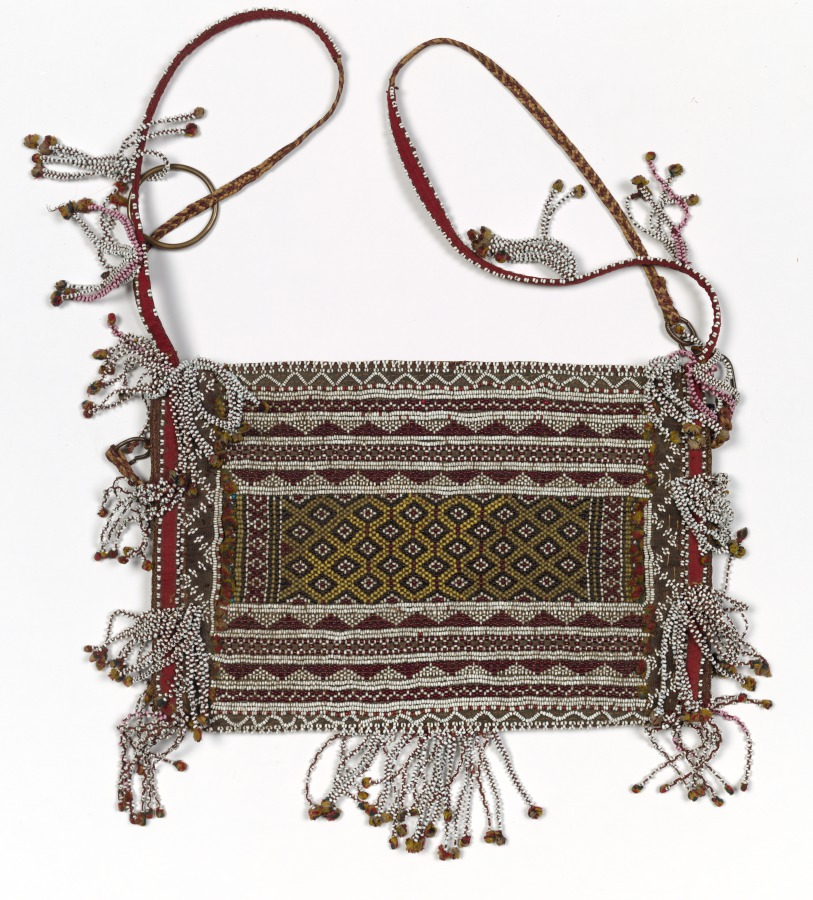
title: Backpack (Bagobo people)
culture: Philippines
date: early 1900s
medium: Handwoven abacá cloth, printed cotton cloth, abacá fiber (braided/plaited cordage), glass beads, metal sequins, metal rings, fiber tassels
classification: Textile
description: This backpack for men is constructed from a single length of handwoven abacá cloth, woven in a warp-faced plain weave with supplementary weft patterning. The beadwork uses glass beads of various colors arranged in geometric bands and diamond motifs characteristic of the Bagobo people. Two shoulder straps, constructed from braided abacá fibers overlaid with cotton cloth and embellished with beads and metal sequins, are attached through metal rings.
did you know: Ethnographic photographs document backpacks like this one being worn by Bagobo men in ceremonial or formal contexts.